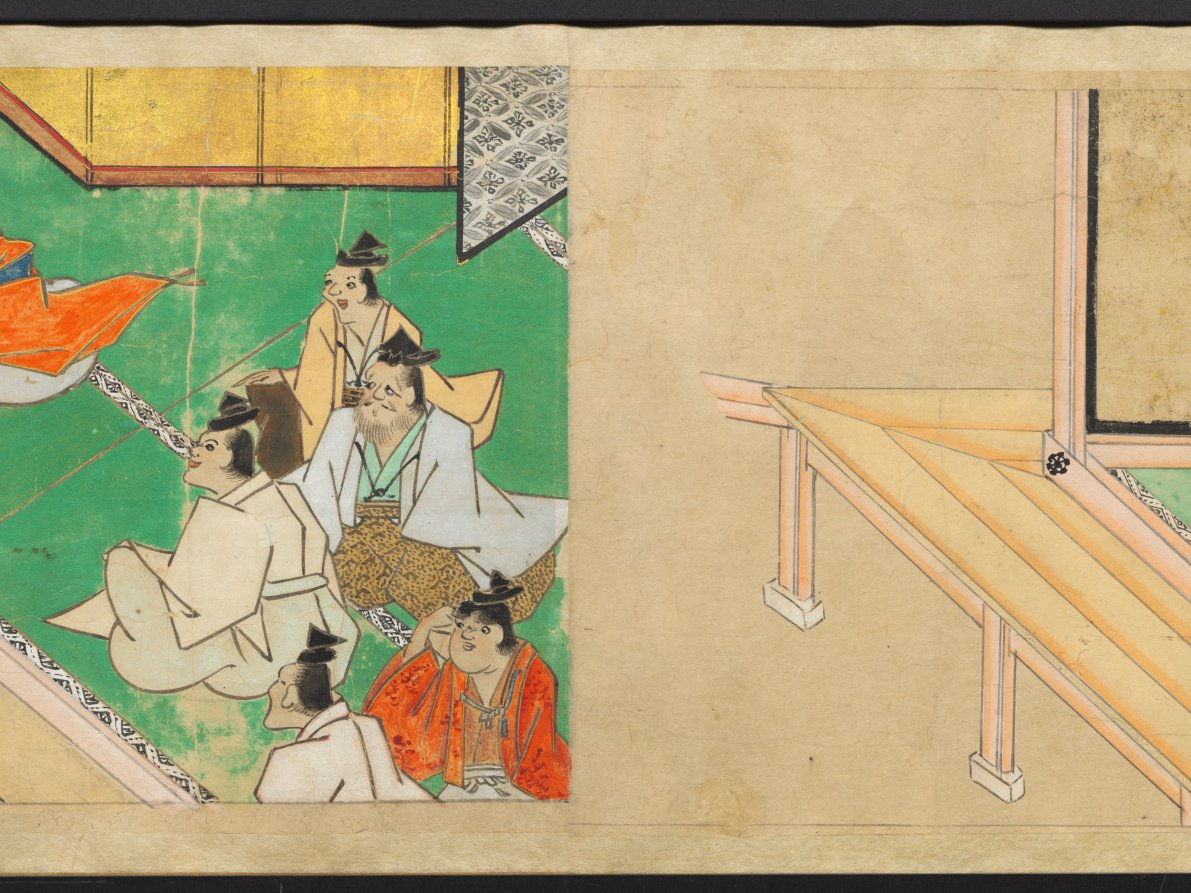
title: The Saltmaker's Story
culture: Japan, Edo period (1615–1868)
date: early 1600s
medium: One of a pair of handscrolls; ink, color, and gold on paper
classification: Painting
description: Once read and copied by girls at New Year’s celebrations and included in dowries, The Saltmaker’s Story is a rags-to-riches tale in which daughters are gifts from the gods. Despite his simple outlook, the main character progresses from humble roots as an associate at Kashima Shrine to the elite status of grandfather of the emperor through the intervention of the Kashima deity. The Saltmaker’s Story is traditionally presented in a set of three scrolls, but the text of this set has been removed by a previous owner, who remounted the illustrations as a pair. The paintings of this one take us from right to left through the first half of the tale.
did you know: This handscroll originally had texts before its paintings, but the texts were removed.